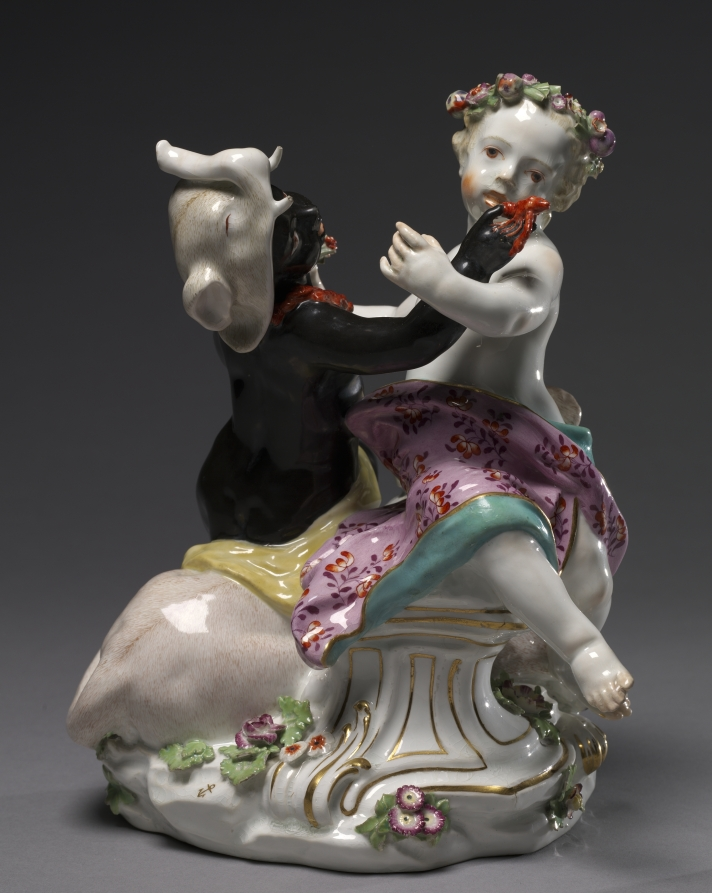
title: Figure of Asia and Africa from the Four Continents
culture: England, Chelsea, mid-18th century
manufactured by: Chelsea Porcelain Factory (Britain, London, 1745–84)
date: c. 1760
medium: soft-paste porcelain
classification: Ceramic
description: Often collected by wealthy British merchants who were beneficiaries of colonial expansion, figural groups were frequently part of elaborate table decorations meant to signify wealth and global dominance. In this work, Africa, who wears an elephant headdress and holds a scorpion in one hand, wrestles with Asia, who is surrounded by perfumes and native fruits. These depictions of Africa and Asia reveal a purely imagined understanding of faraway places.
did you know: Figural representations of the four continents date back to the 1500s, but such imagery became even more popular in the 1700s as European empires expanded.